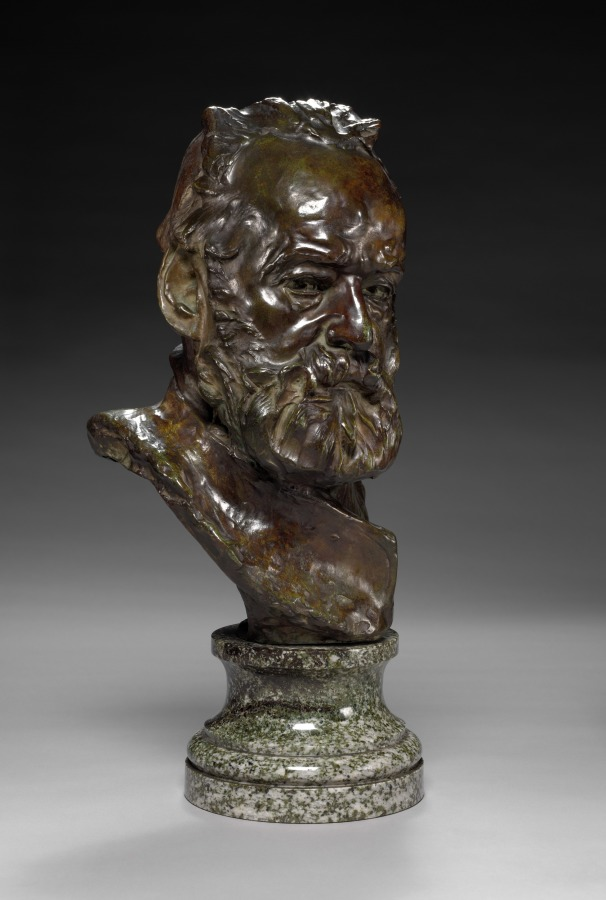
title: Bust of Victor Hugo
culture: France, 19th century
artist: Auguste Rodin (French, 1840–1917)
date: 1883 modeled; cast by 1917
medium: bronze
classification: Sculpture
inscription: inscribed on back: "A. Rodin" signed "Rodin" (back, lower left)